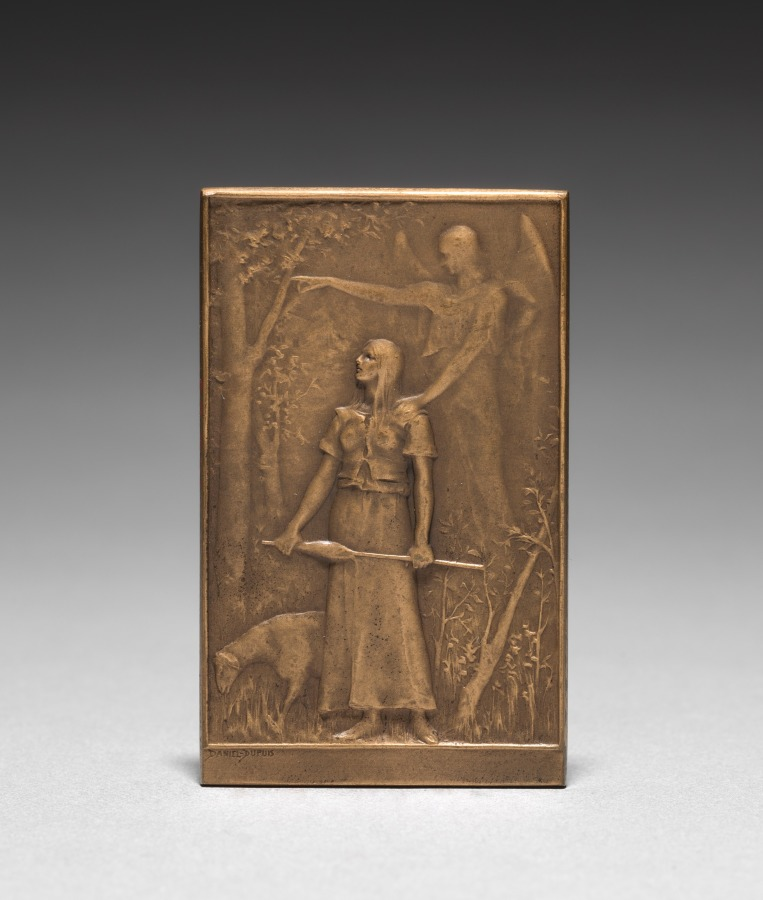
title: Medallion: Jeanne d'Arc (obverse)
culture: France, 19th century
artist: Daniel Dupuis (French, 1819–1899)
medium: bronze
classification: Metalwork